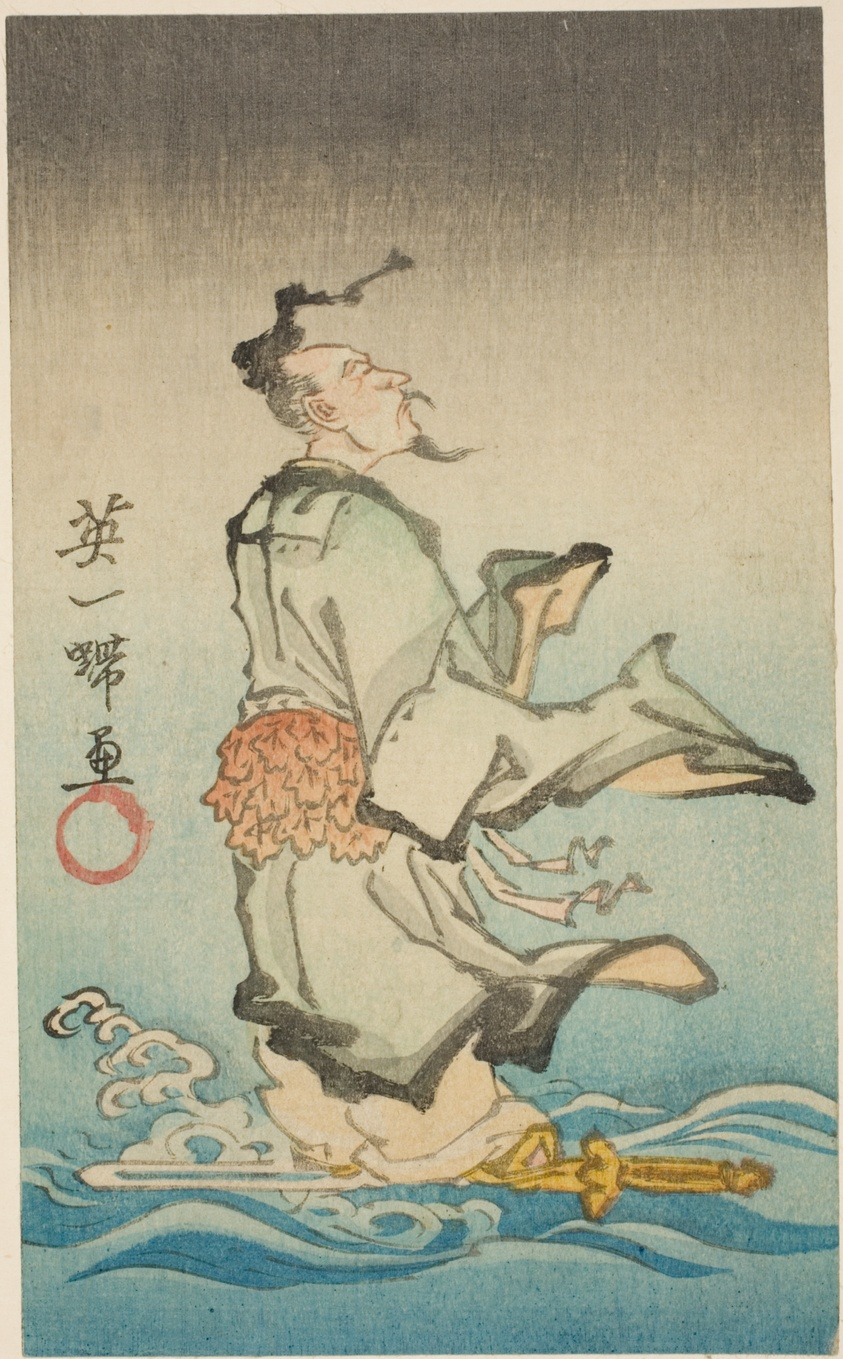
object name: Print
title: Joriken riding his sword across water, section of a sheet from an untitled harimaze series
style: Japanese (culture or style)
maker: Utagawa Kunisada I (Toyokuni III) (Japanese, 1786–1864)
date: 1858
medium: Color woodblock print; section of harimaze sheet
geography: Japan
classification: woodblock print; print; asian art